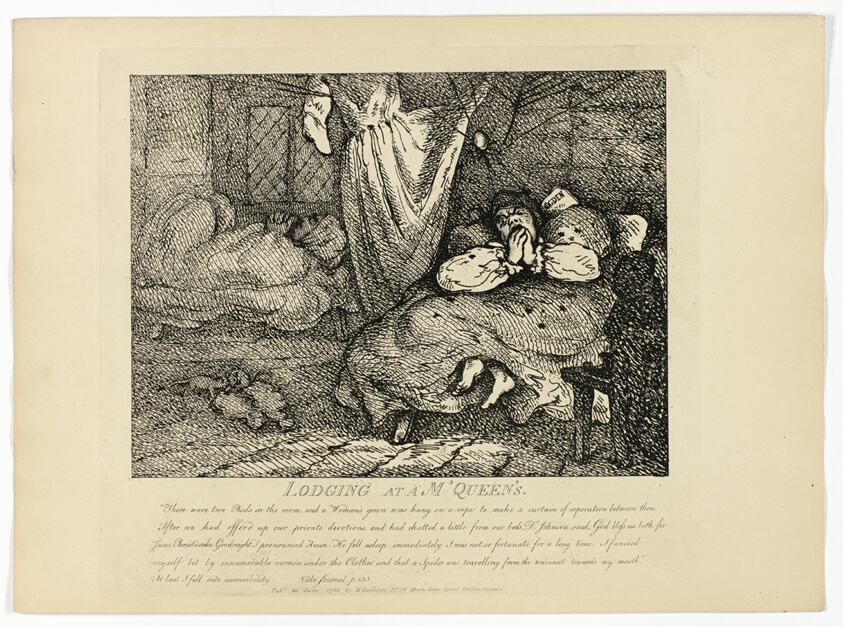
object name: Print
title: Lodging at M'Queen's, from Boswell's Tour of the Hebrides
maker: Thomas Rowlandson (English, 1756-1827)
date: 1786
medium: Etching on paper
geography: England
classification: etching; print; prints and drawing